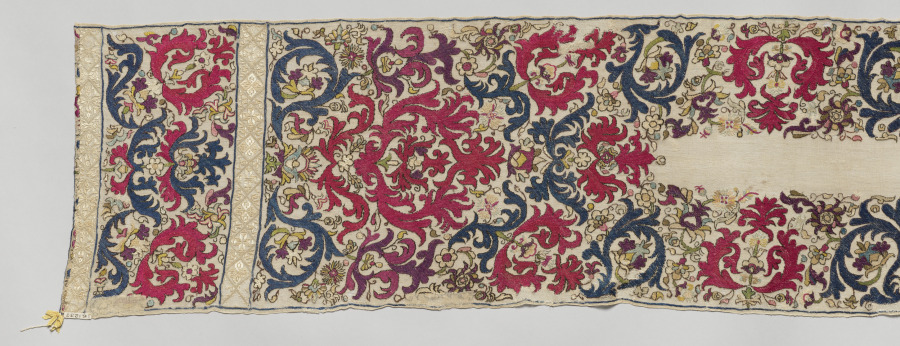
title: Headkerchief (tensifa)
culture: Africa, North Africa, Algeria, Algerian embroiderer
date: 1700s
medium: Linen, silk, gold, silver, dye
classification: Embroidery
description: This beautiful kerchief, worn wrapped around the head, was part of elegant bathing equipment that well-to-do women wore while relaxing in a hammam after bathing. The floral and foliate embroidery reflect a fashion that lasted for more than a century. This example is dominated by brilliant crimson and blue silk stitches.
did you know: This textile was displayed in the CMA’s first exhibition in 1916. While it is from North Africa, it was displayed in the "Nearer East" gallery.